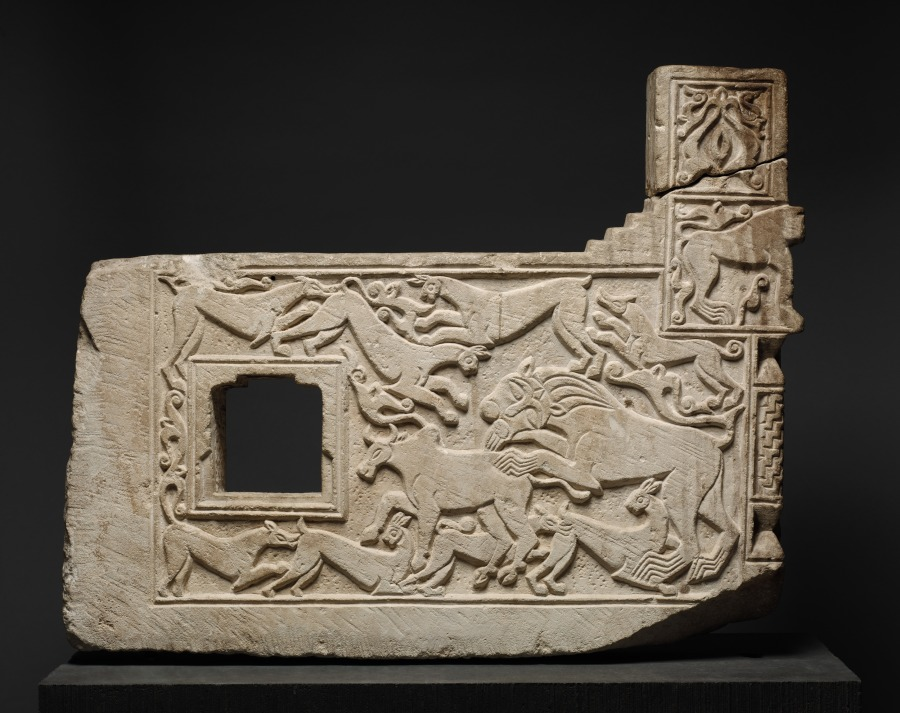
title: Balustrade Fragment with Animals from the residence of Hajji Hasan ibn Ibrahim ibn Muhammad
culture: Iran, Hamadan, Ilkhanid period (1256–1353)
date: 1303–4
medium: limestone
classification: Sculpture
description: This architectural relief shows a lion attacking a bull surrounded by other predators pursuing their prey, with scrolling vegetal motifs filling the spaces between. Scenes of powerful predators in the act of hunting and capturing other animals echo the royal imagery of pre-Islamic Iran. This piece was part of a balustrade in a private home; the owner and construction date are known from another fragment from the same building. The building was embellished when the Mongols controlled Iran, and the relief shows a continuity in style from carvings made during the preceding Turkic Seljuk period (1037–1194). Under Turkic and Mongol rule in Iran, Islamic injunctions against making figural imagery were loosened.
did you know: This balustrade and two others, now in the Metropolitan Museum of Art in New York and the Louvre in Paris, are from a building probably in the city of Hamadan, Iran.